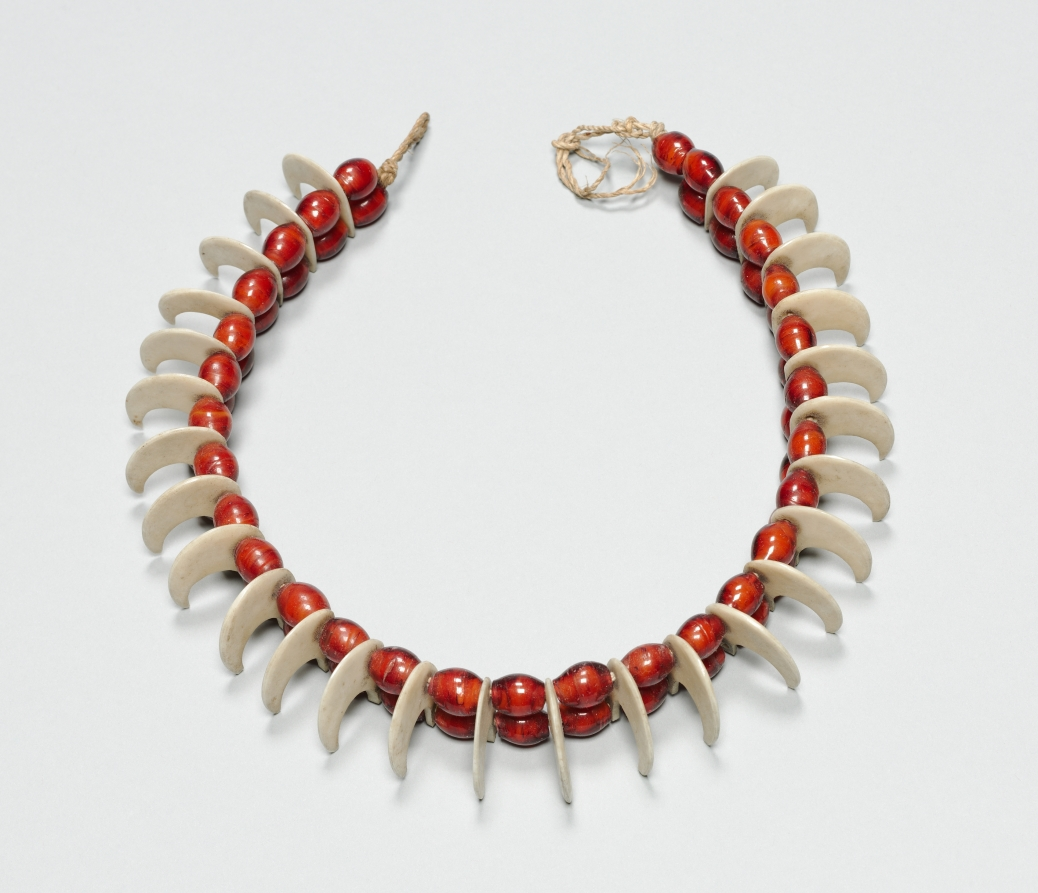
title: Necklace (amazipho)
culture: Africa, Southern Africa, South Africa, Southeast Cape Region, Northern Nguni (Zulu)-style maker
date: 1800s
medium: Glass beads, bone, and sinew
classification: Jewelry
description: When wild game was still plentiful in the region, real animal claws would have been used to punctuate beaded prestige necklaces. Lion-claw necklaces were the exclusive property of royalty while the bone imitations were owned and worn by high-ranking individuals of lesser status. Large red glass beads were also reserved for the Nguni elite in the period before the destruction of the Zulu kingdom in 1879.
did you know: Large red glass beads like the ones in this necklace were reserved for the Nguni elite.